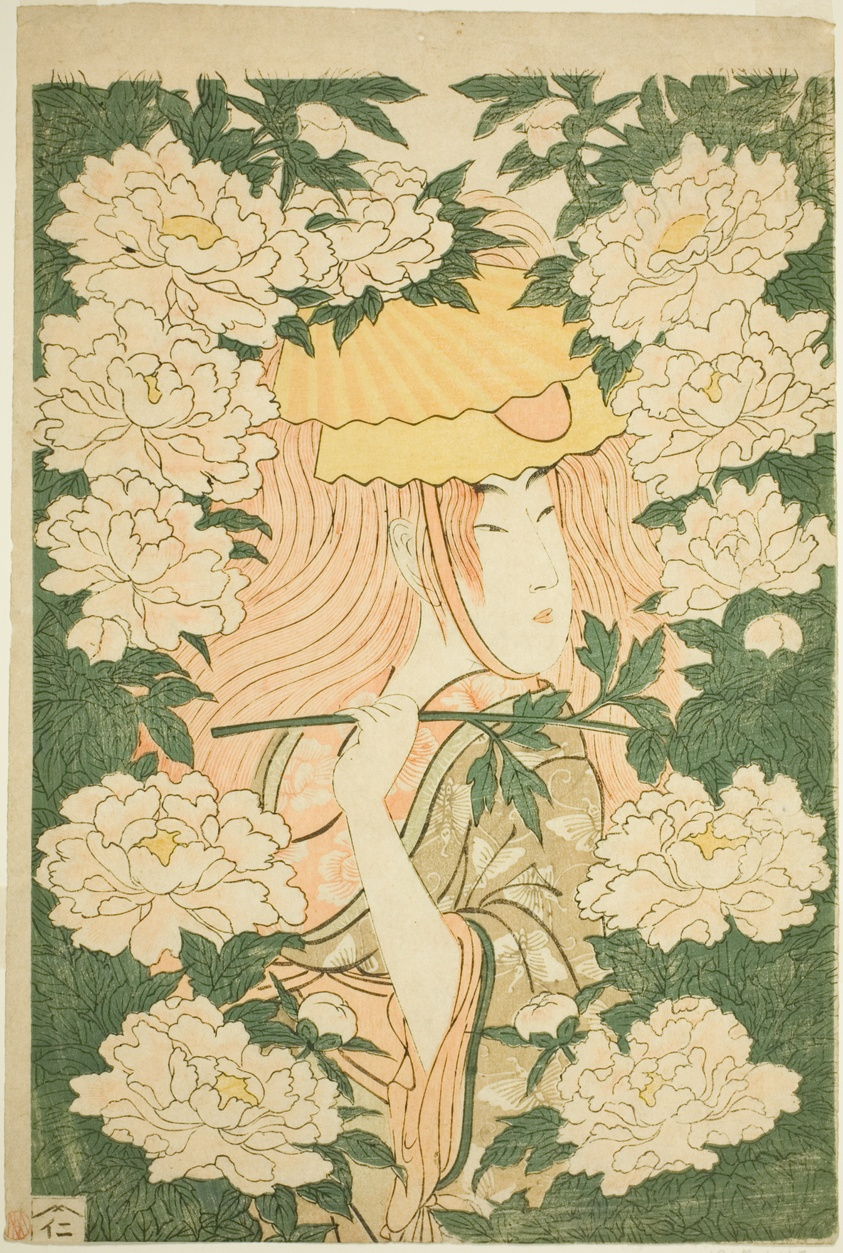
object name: Print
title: Stone Bridge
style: Japanese (culture or style)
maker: Kitagawa Utamaro 喜多川 歌麿; Japanese, 1753 (?)-1806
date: c. 1801/02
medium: Color woodblock print; aiban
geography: Japan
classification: woodblock print; print; asian art